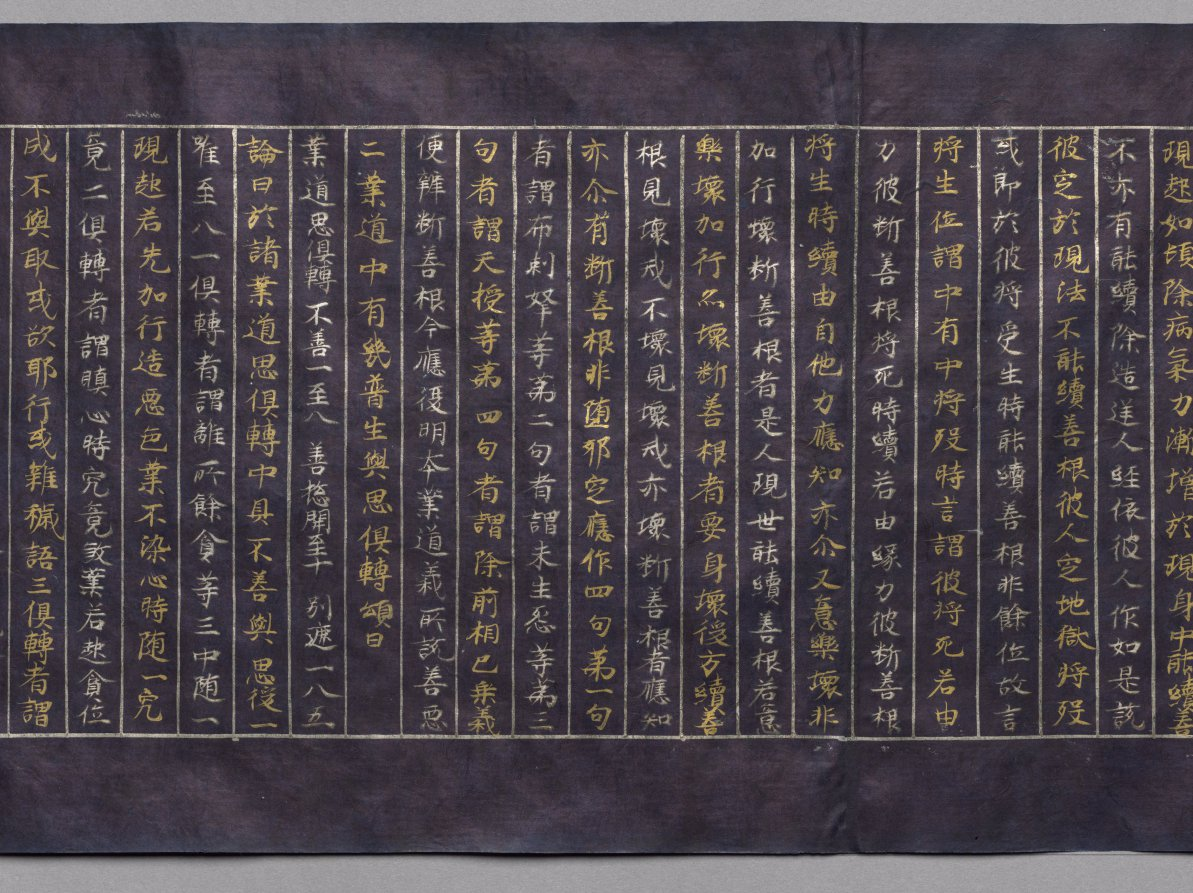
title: Meta-Discourse on the Teachings from the Treasury (Abidharmakosha-Bhashya)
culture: Japan, Heian period (794–1185)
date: 1100s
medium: handscroll; gold and silver on indigo-dyed paper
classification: Manuscript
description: This religious text relates some of the teachings of the great fourth-century Indian Buddhist scholar Vasubhandhu. The text analyzes human consciousness in its relationship to the environment and transformations that occur during meditation. This scroll is the 17th part of a 30-part translation of the text by Xuanzang, an eminent seventh-century Chinese monk.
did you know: The frontispiece depicts the Buddha Shakyamuni preaching in a paradisical landscape.